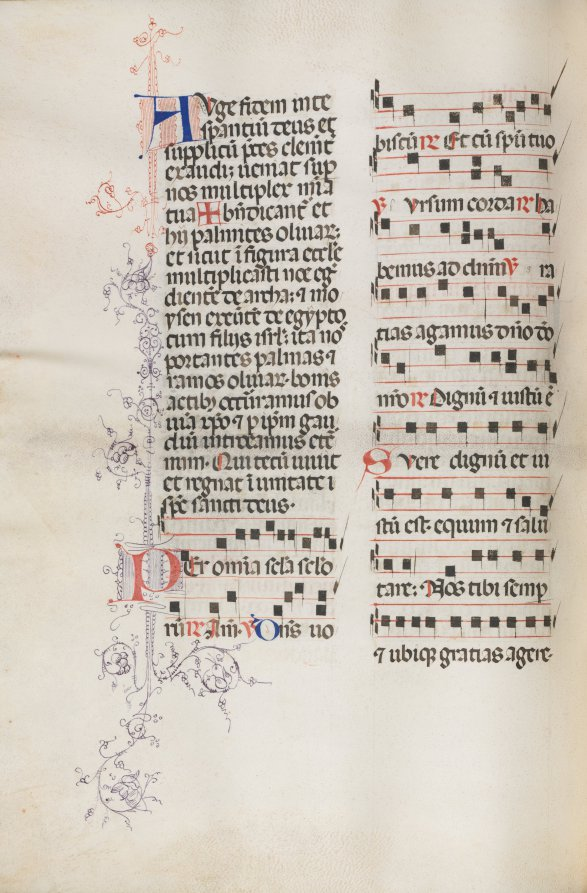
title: Missale: Fol. 111v; contains some music as part of Palm Sunday liturgy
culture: Italy, Perugia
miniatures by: Bartolommeo Caporali (Italian, c. 1420–1503)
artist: assisted by Giapeco Caporali (Italian, d. 1478)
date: 1469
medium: ink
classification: Bound Volume